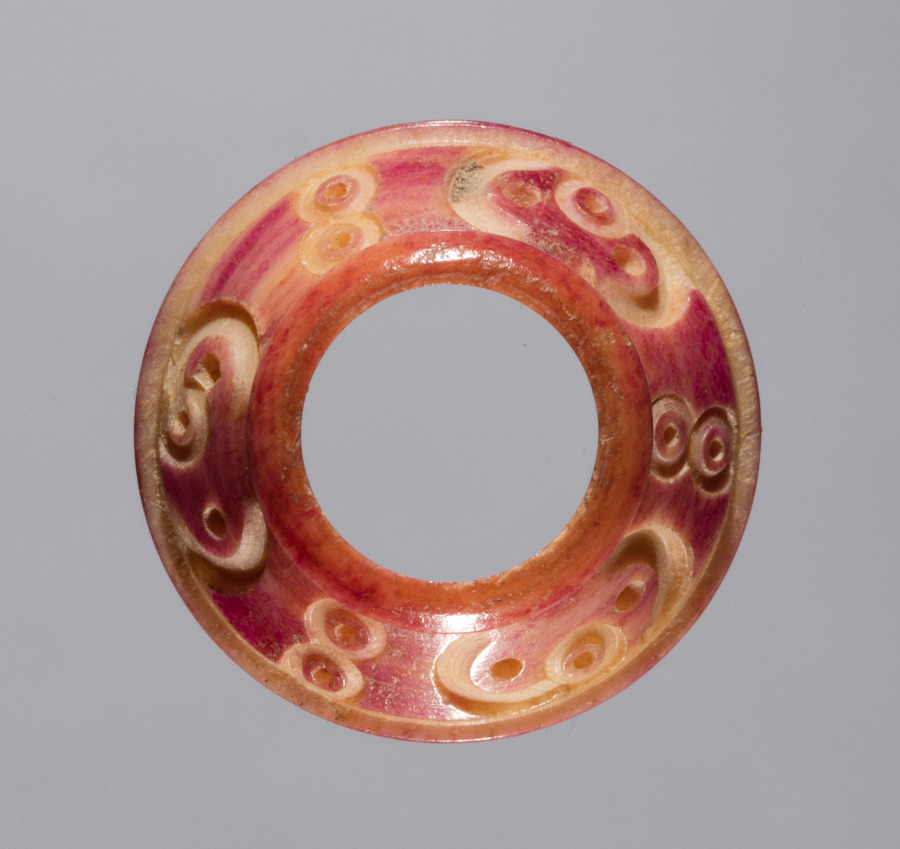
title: Spindle Whorl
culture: Iran, early Islamic period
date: 700s - 900s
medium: bone, incised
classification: Spindle Whorl